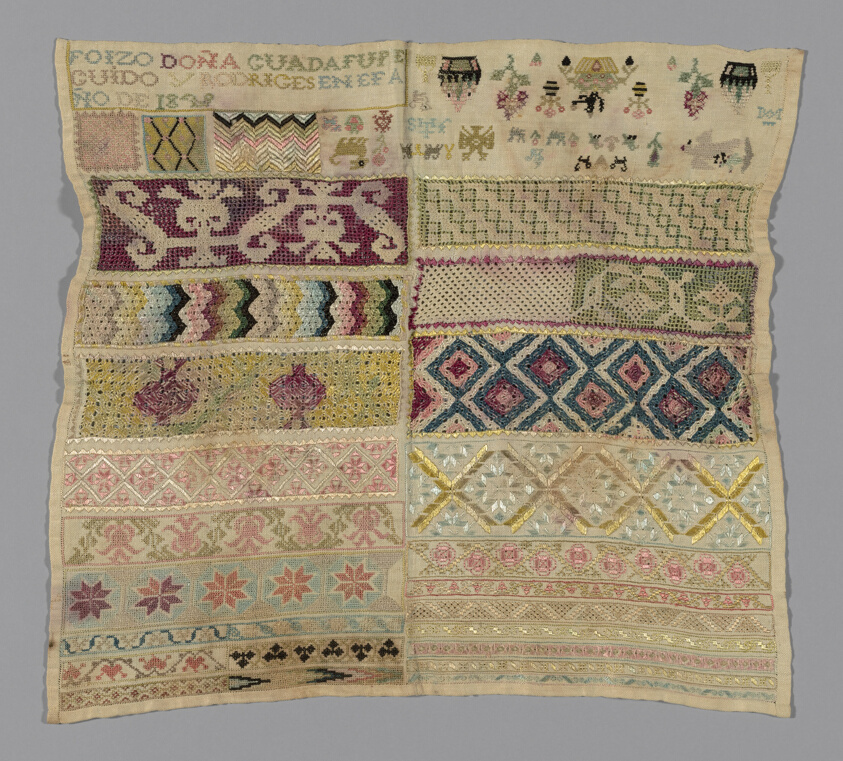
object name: Textile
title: Sampler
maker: Spain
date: 19th century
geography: Spain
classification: textile; needlework (visual works); sampler